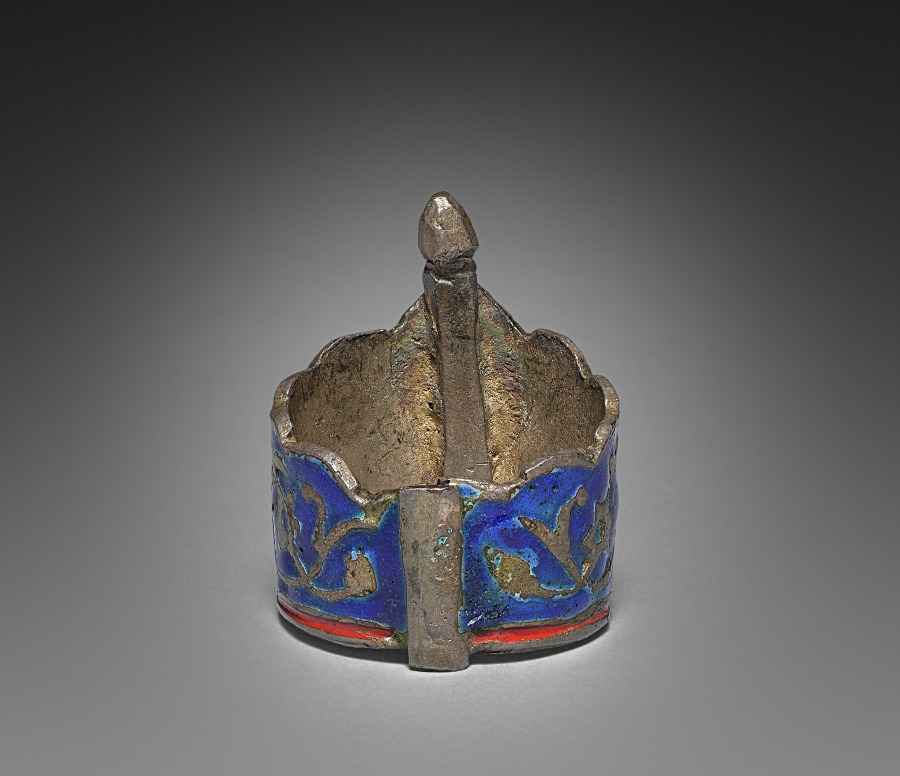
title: Ring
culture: India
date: 1800s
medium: silver and enamel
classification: Jewelry